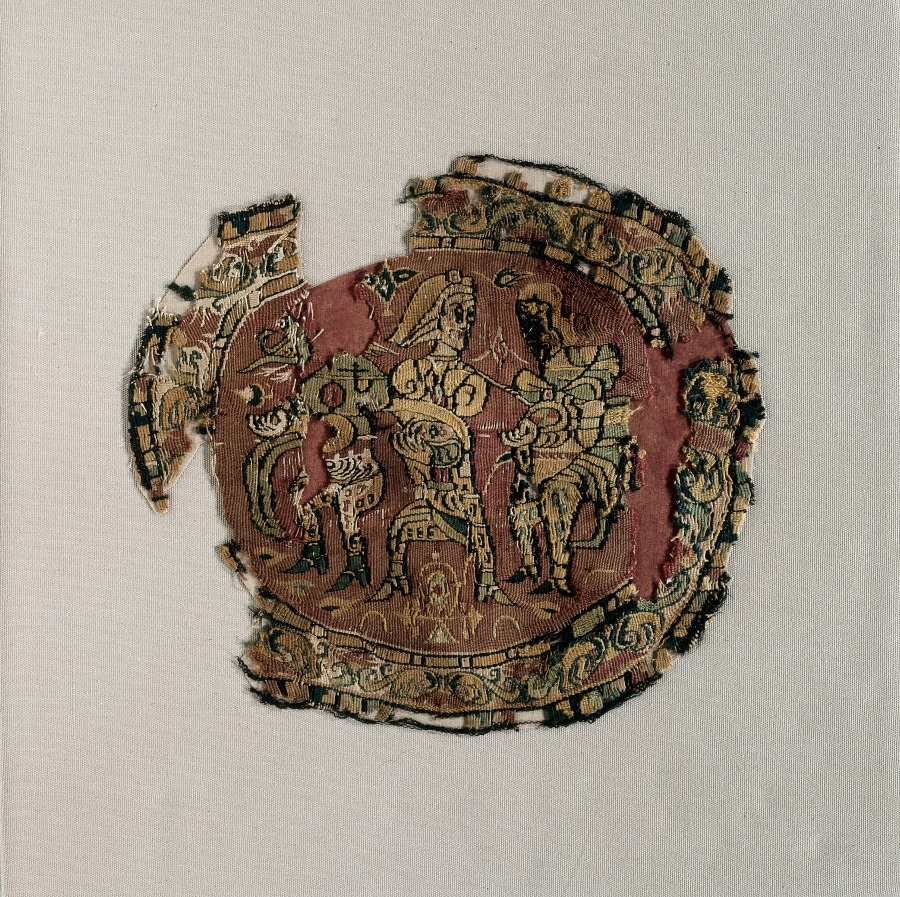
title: Three Figures from a Tunic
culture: Egypt, Abbasid period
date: 750–800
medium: tapestry weave; undyed linen and dyed wool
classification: Textile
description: Three figures are clothed in large shawls, spotted trousers, and riding boots. They awkwardly carry gifts in bowls or on trays, since their large hands and arms do not seem connected to their bodies.